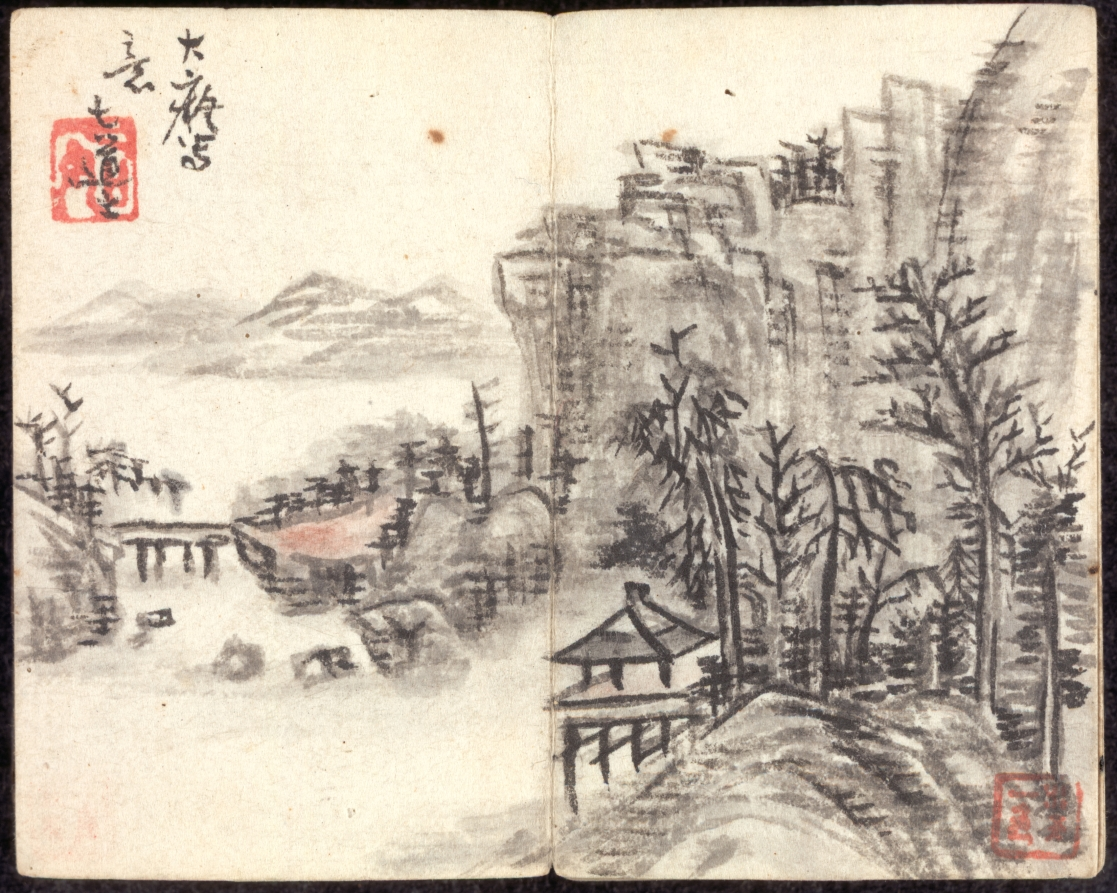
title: Miniature Album with Figures and Landscape (Cliff Landscape with Bridge)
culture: China, Qing dynasty (1644–1911), Qianlong reign (1736–95)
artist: Zeng Yandong (Chinese, c. 1751–1827)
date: 1822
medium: album leaf, ink and color on paper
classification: Painting